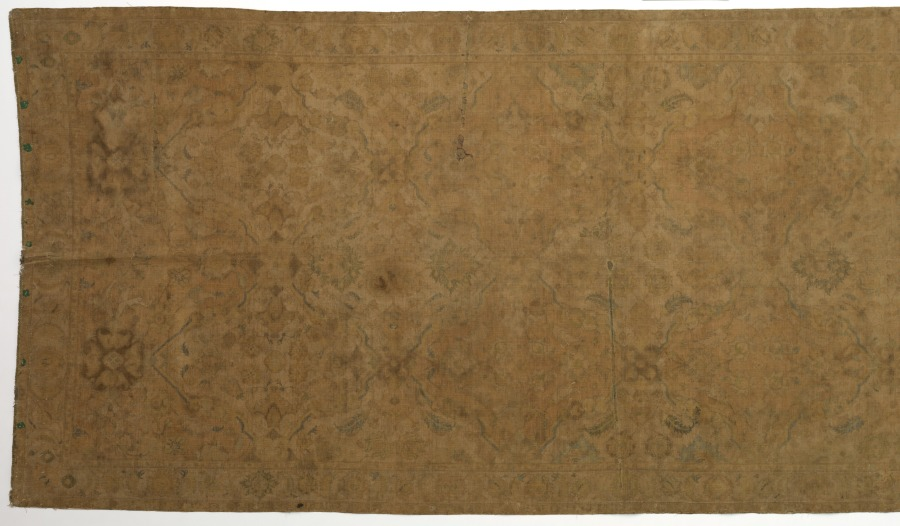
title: Carpet, so-called "Polonaise"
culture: Iran, 17th century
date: 17th century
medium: senna knot: silk, silver and gold filé brocading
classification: Carpet